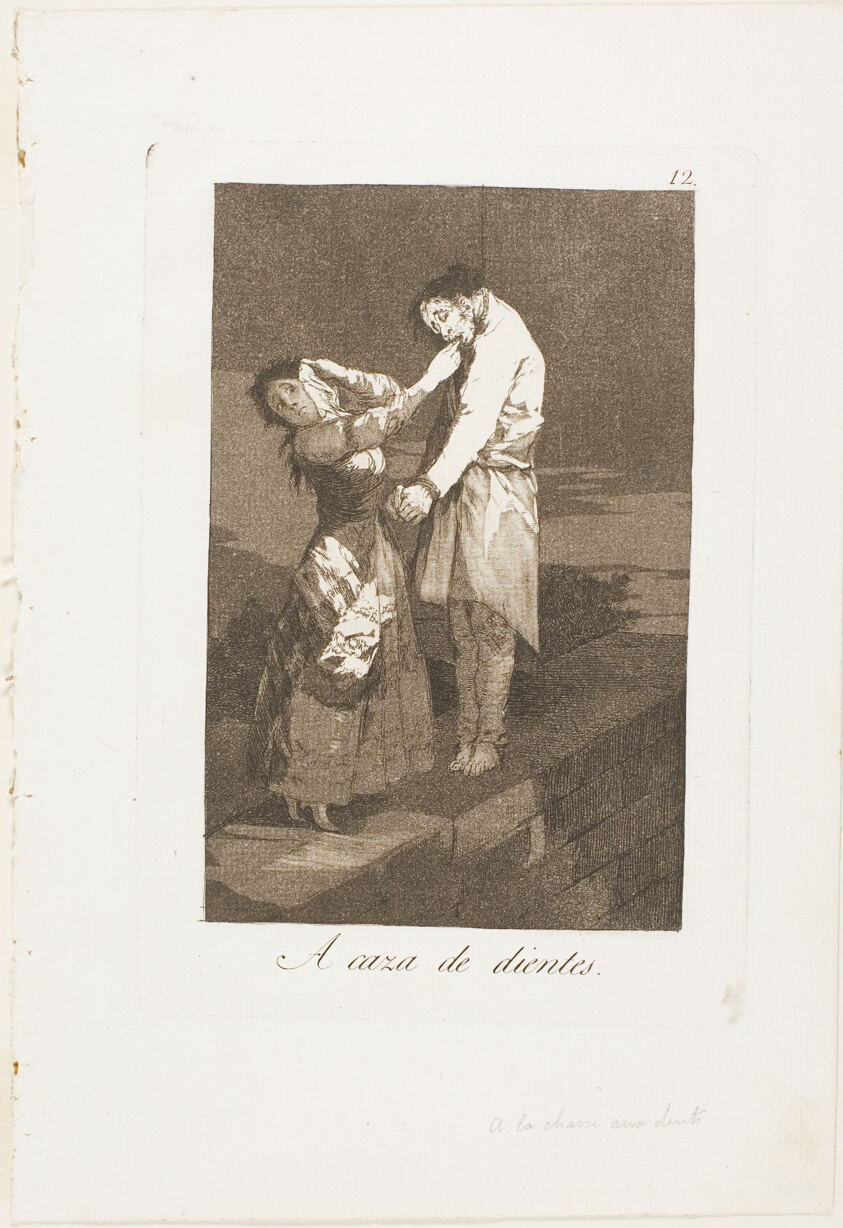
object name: Print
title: Out Hunting for Teeth, plate twelve from Los Caprichos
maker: Francisco José de Goya y Lucientes (Spanish, 1746-1828)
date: 1797/99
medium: Etching, burnished aquatint and burin on ivory laid paper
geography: Spain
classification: etching; print; prints and drawing